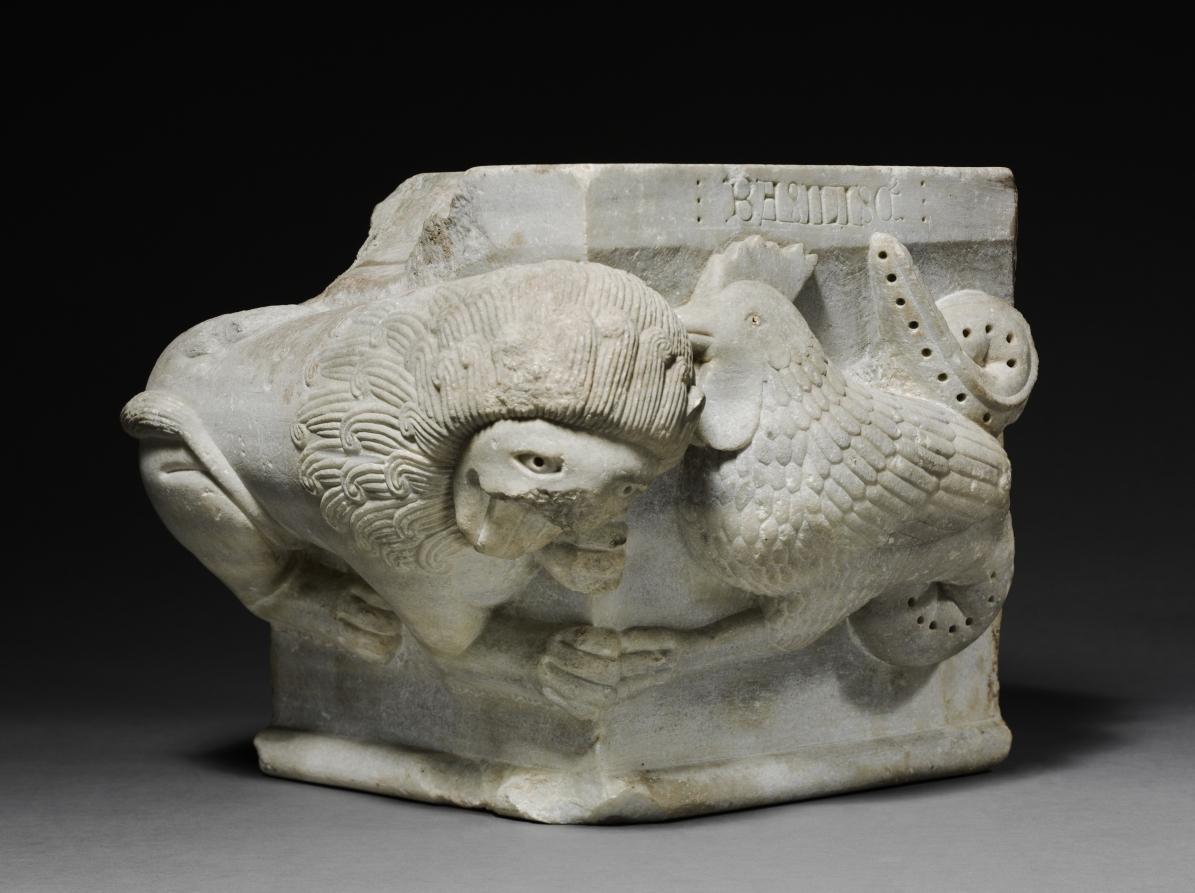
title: Engaged Capital with a Lion and a Basilisk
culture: Northern Italy, Emilia (Bologna?), 12th century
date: 1175–1200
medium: marble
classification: Sculpture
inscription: BASILISC.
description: The basilisk is an imaginary animal, half cock and half snake. According to medieval bestiaries, the basilisk could kill merely by its glance. It was commonly held as the symbol of the devil to be trodden down by Christ, first at the moment of his incarnation and then again during the Last Judgment.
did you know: This capital depicts a struggle between the good lion and the evil basilisk, a legendary reptile from myth. While the artist would not have encountered the mythical serpent, it is likely he never saw a real lion either based on its cartoonish appearance in this sculpture.